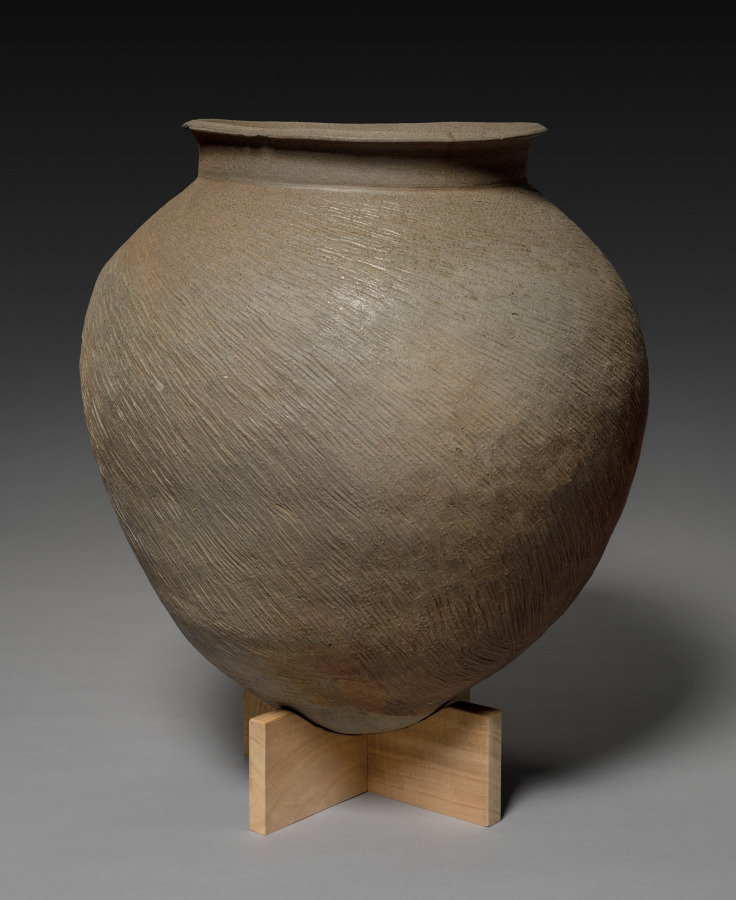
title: Wide-Mouth Jar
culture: Japan, Kamakura period (1185–1333) to Muromachi period (1392–1573)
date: 1300s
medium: Stoneware with impressed and incised decoration (Suzu ware)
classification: Ceramic